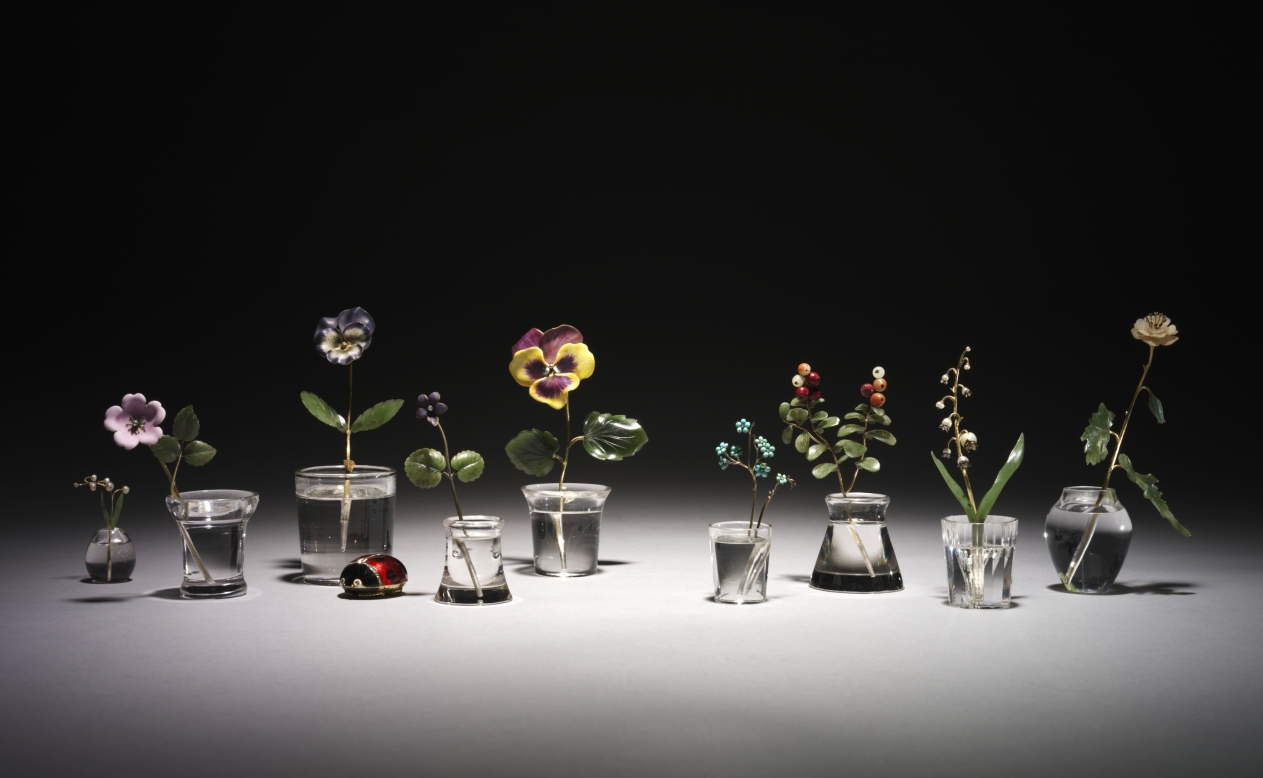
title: Flower Study of an Anemone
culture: Russia, St. Petersburg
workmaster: Henrik Wigström (Russian, 1862–1923)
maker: House of Fabergé (Russian, 1842–1918)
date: c. 1905–15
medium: mat white stone, gold, sapphires, jade, rock crystal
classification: Miscellaneous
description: This flower study depicts a wild anemone in bloom. Fabergé’s inspiration for his flower studies is said to have come from the floral brooches of precious stones that were made in the 1700s for Catherine the Great as well as from the Japanese art of flower arranging, known as ikebana. Small and delicate, Fabergé’s flower studies were given as intimate gifts to friends by the tsarina and others in the court. She also liked to take them around to wherever the imperial family was residing as a reminder of spring during the harsh Russian winters.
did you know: The stems of Fabergé’s flower studies are set into little basins carved from rock crystal to resemble pots of water.